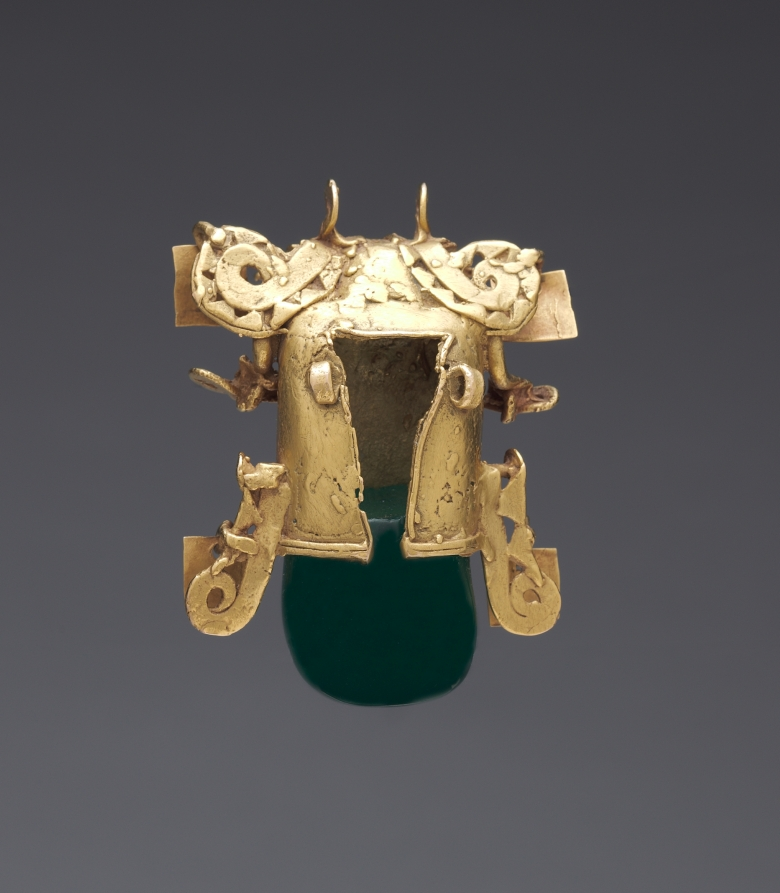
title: Crocodile Pendant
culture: Panama, Azuero Peninsula, Parita style, 11th-16th century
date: 1000–1550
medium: cast gold, modern greenstone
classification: Metalwork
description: Of great importance in ancient Panama were beings that combined crocodile features, especially the mouth, with lizard traits, such as the iguana’s head crest. This example also has a back-swept nose, perhaps that of the leaf-nosed bat. The greenstone is a modern replacement for a stone or shell that once completed the crocodile’s body.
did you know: The greenstone replaced a piece of carved whale bone that was once improperly paired with the pendant.